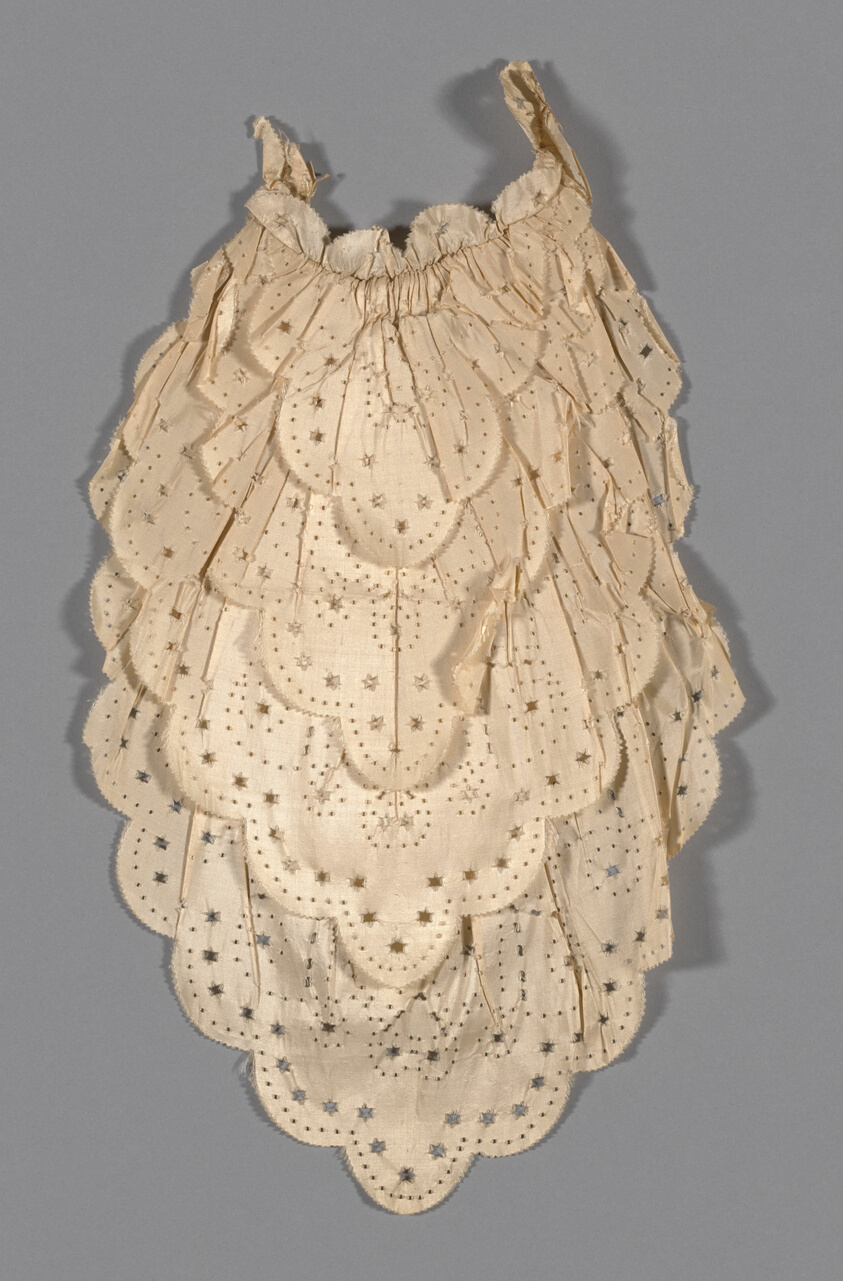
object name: Textile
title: Sleeve Pieces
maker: France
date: 1758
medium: White taffeta with cut work pattern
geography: France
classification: textile; weaving